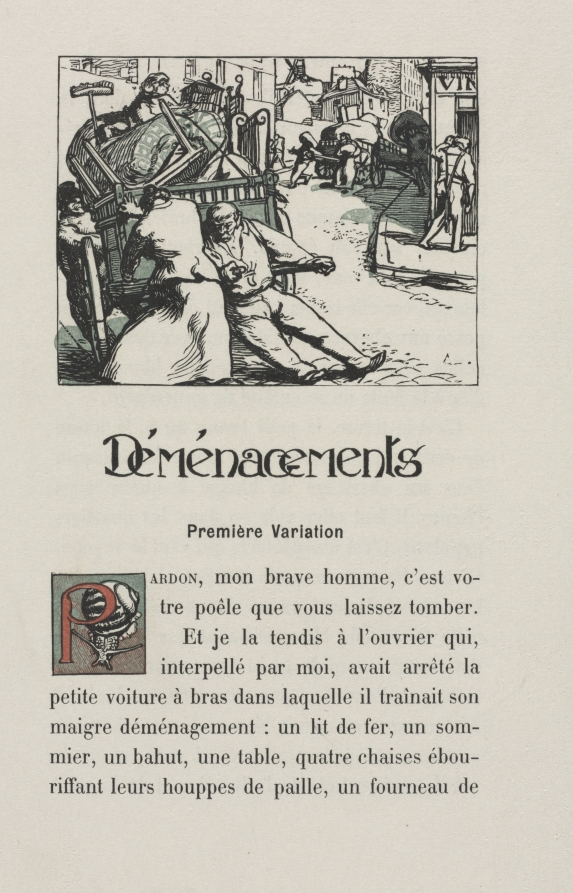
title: Landscapes and Street Corners: Moving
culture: France, 19th century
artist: Auguste Louis Lepère (French, 1849–1918)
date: 1900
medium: color woodcut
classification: Print